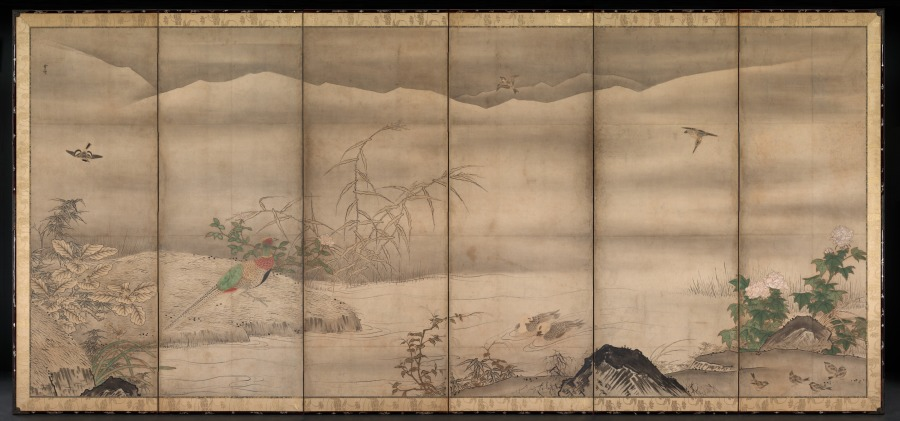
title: Birds and Flowers in a Landscape of the Four Seasons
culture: Japan, Muromachi period (1392–1573)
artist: follower of Sesshū Tōyō (Japanese, 1420–1506)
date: 1550–99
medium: Six-panel folding screen, ink and color on paper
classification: Painting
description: The monk-painter Sesshū is revered today, as he was in his own time. While he left Kyoto's sophisticated intellectual and cultural environment to live in a provincial village in a far western province, he seems never to have severed contacts with the monastic communities of his young adulthood. His residence in Yamaguchi proved fortuitous because his patron, the region's military lord, enjoyed considerable freedom in conducting trade missions overseas with Korea and China. Sesshū went to China in 1467 and traveled about the country, visiting well-known historical sites and Chan (Zen) temples before returning two years later. Thus he became familiar with contemporary painting practices, materials, formats, and subject matter. His assimilation and then transmission of these elements had a profound impact on the following generations of ink painters, patrons, and Zen communities throughout Japan. Despite the presence on these byōbu of the name "Sesshū," they are from the hand of another accomplished but as yet anonymous follower active in the middle of the sixteenth century. Sesshū's name here, as on a handful of similar bird-and-flower byōbu, attests to the master's identification at that time with the colorful mural paintings on the same theme emanating from Ming dynasty China. This genre had heretofore been relegated to hanging scroll compositions, so the intro-duction into temple and daimyo residences of such an attractive theme surely caused considerable excitement in the later fifteenth century, when in all likelihood Sesshū introduced it into the Japanese painting repertoire. Subsequently, artists of varying backgrounds and training tried their hands at these large, dramatic scenes. From right to left the composition portrays an array of flowering plants in the near distance that indicate the passage of the seasons. Birds, usually paired, occupy this setting, engaged in various activities that lend naturalism and an air of peacefulness. The world they inhabit may be characterized pictorially by expansive middle-ground waterscapes that end where the far distant mountains rise as backdrops. These features appear consistently in other bird-and-flower byōbu attributed to Sesshū. Also noteworthy is the absence of any birds of prey such as the samurai's beloved hawks, emblems of fierceness and graceful strength that appear often in the byōbu of sixteenth-century Kano and Soga school painters.